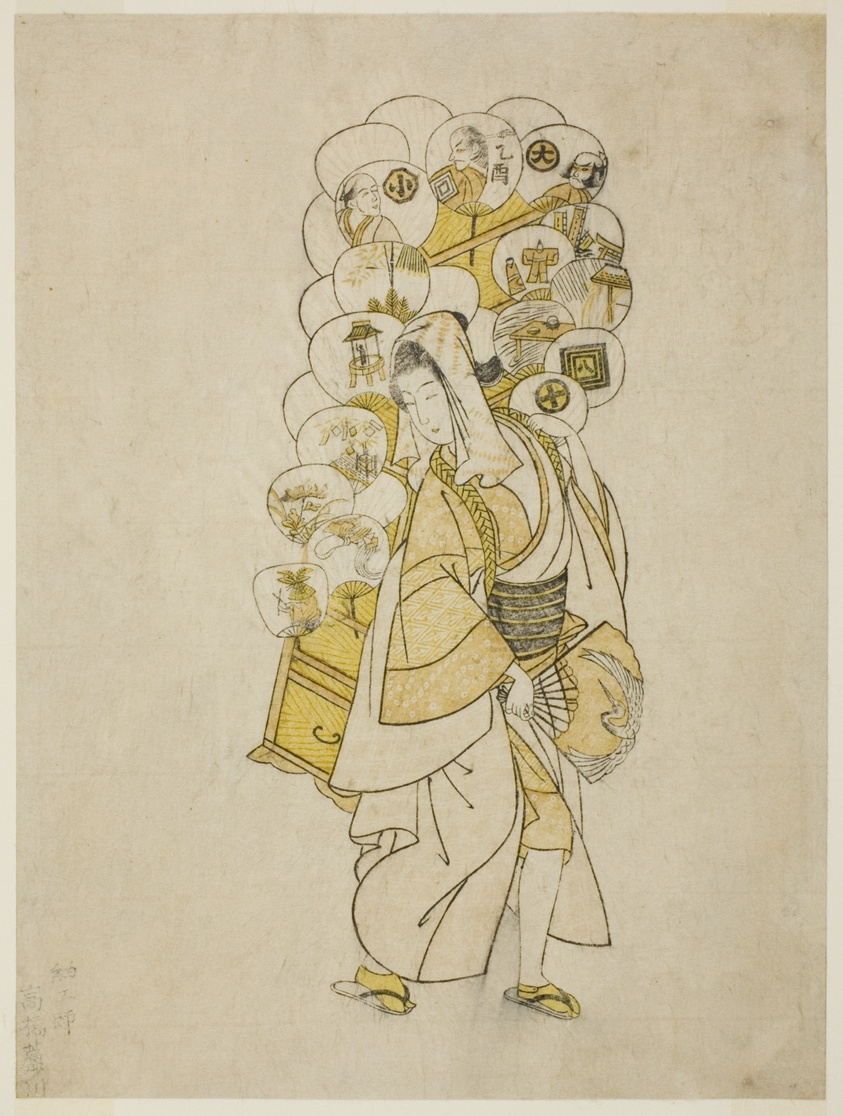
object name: Print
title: The Fan Peddler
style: Japanese (culture or style)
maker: Attributed to Suzuki Harunobu 鈴木 春信; Japanese, 1725 (?)–1770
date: 1765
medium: Color woodblock print; chuban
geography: Japan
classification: woodblock print; print; asian art